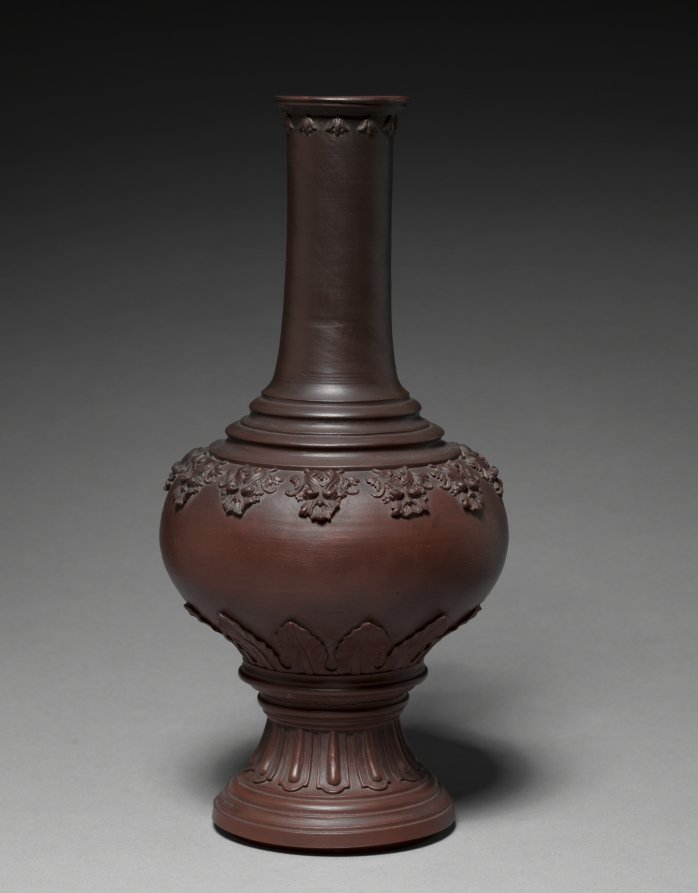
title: Vase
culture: Germany, Meissen, 18th century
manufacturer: Meissen Porcelain Factory (German, est. c. 1710)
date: c. 1710–1715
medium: red stoneware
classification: Ceramic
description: Because of firing difficulties, early Meissen red stoneware is often inconsistent in color. That is true of this piece, the neck of which is darker than the body. Faint traces of gilding remain on the neck, indicating that originally the change in color was disguised by an overlay of gilded ornament.